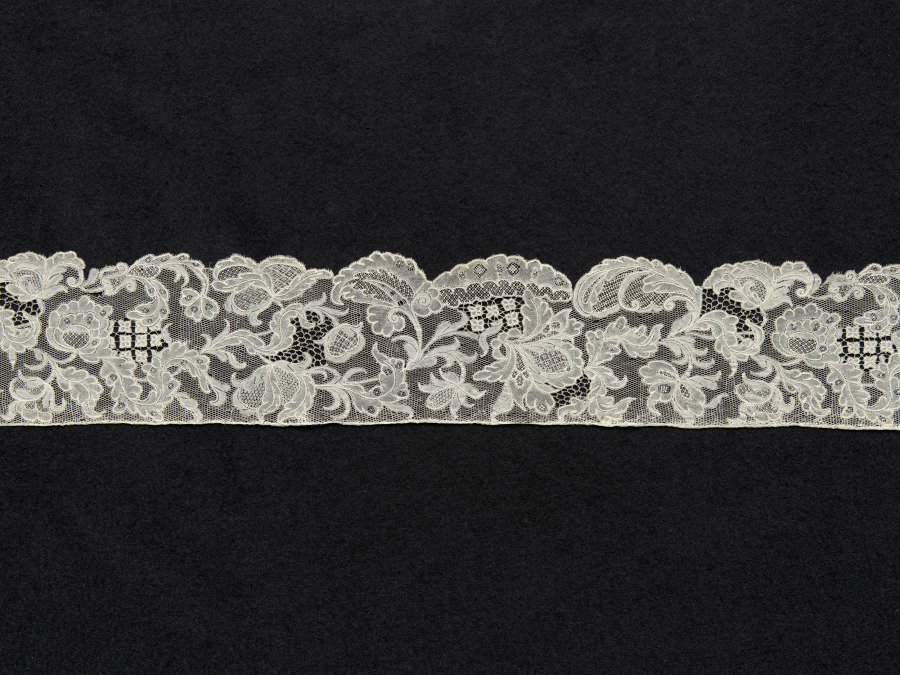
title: Lace Edging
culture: Belgium, Brussels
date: early 1700s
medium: Bobbin lace (Point d'Angleterre)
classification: Lace